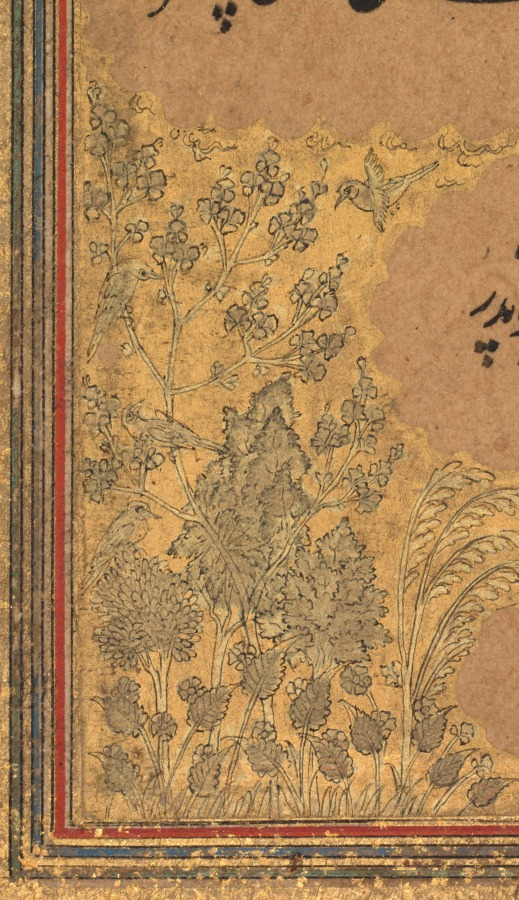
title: From Dohras (Songs) 40 and 36 from the Kitab-i Nauras of Sultan Ibrahim Adil Shah II (verso)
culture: India, Bijapur, Deccan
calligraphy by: Khalilullah Butshikan (Persian, active in India 1596–c. 1620)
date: 1618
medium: ink with two-tone gold on paper, double-sided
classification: Painting